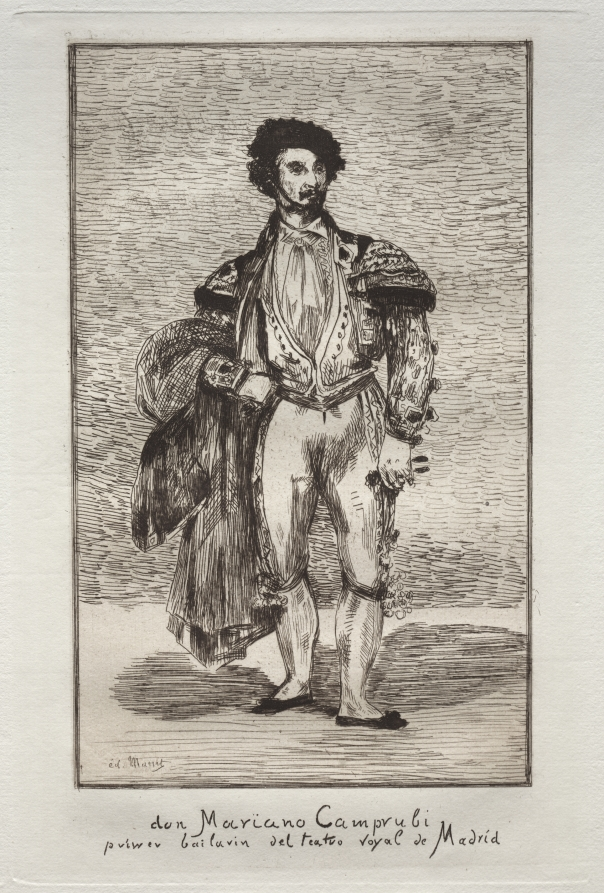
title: Le Bailarin ( Don Mariano Camprubi )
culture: France, 19th century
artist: Édouard Manet (French, 1832–1883)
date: 1862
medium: etching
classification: Print